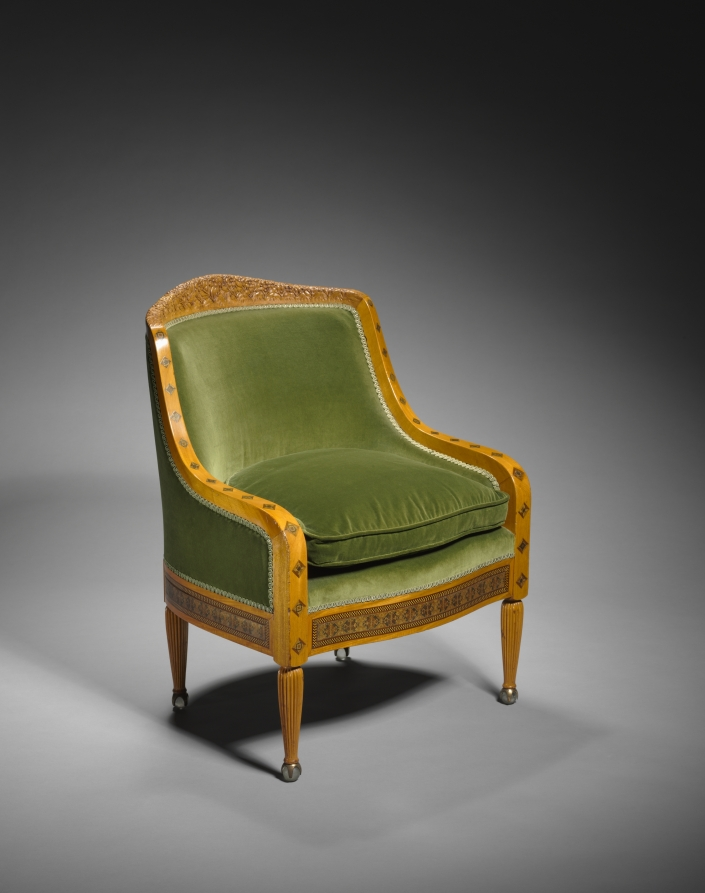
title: Armchair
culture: America, New York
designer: Louis Comfort Tiffany (American, 1848–1933)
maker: Tiffany Glass & Decorating Company (America, New York, 1892–1902)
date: c. 1891–93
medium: Primavera with inlays of brass and various woods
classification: Furniture and woodwork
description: Louis Comfort Tiffany began his artistic career as a painter, having studied with George Innes and Samuel Colman in America as well as with various artists in Paris. While he achieved some early success with his orientalist works, his interests were soon drawn to interior furnishings and design. He collaborated with other artisans to form Associated Artists in 1879 and began work on major commissions such as the Mark Twain House (1881) and the White House for President Chester Arthur (1882). He debuted designs for furniture at the 1893 Chicago world's fair, and this armchair is believed to have been among those pieces. Even after he achieved enormous success with his glass production, Tiffany continued to produce interior furnishings and design schemes for artistic interiors throughout the rest of his career.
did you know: Embellished with elaborate carved flowers and inlaid wooden mosaics, this armchair repeats many of the motifs found in Tiffany’s lamps.